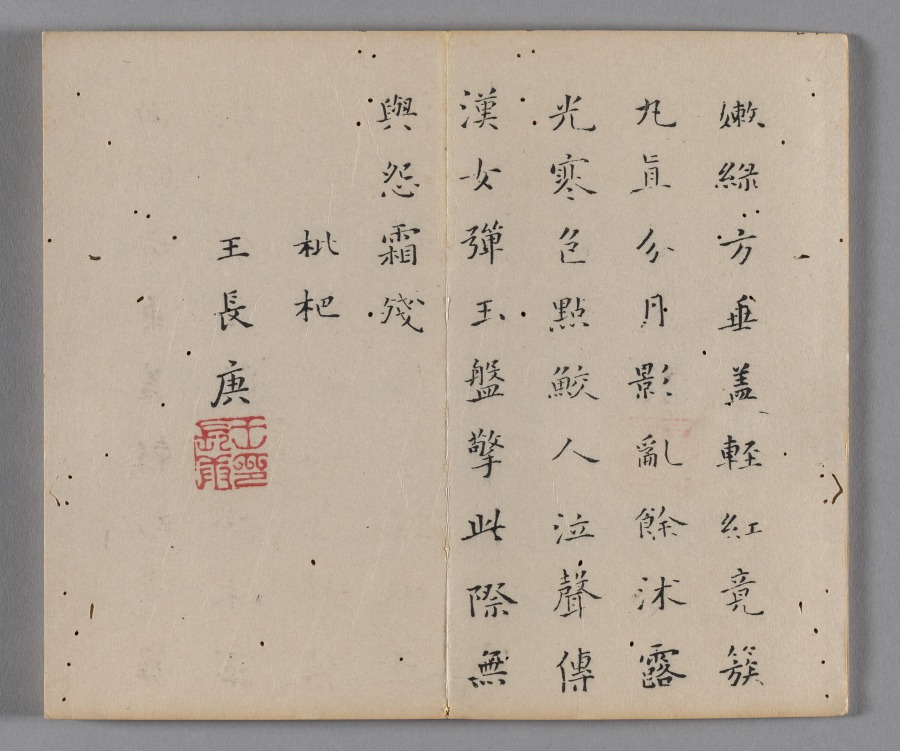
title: Ten Bamboo Studio Painting and Calligraphy Handbook (Shizhuzhai shuhua pu): Fruit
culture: China, Qing dynasty (1644-1911)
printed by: Hu Zhengyan (Chinese, c. 1584–1674)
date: 1633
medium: Woodblock-printed book; ink and colors on paper; first edition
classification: Print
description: Color printing reached a level of perfection in the early 1600s, as seen in this Ten Bamboo Studio Collection of Calligraphy and Painting and the Mustard Seed Garden Manual of Painting (printed 1679 and 1701). The painterly quality, precision in registering (aligning) the woodblocks, and harmonious colors made them the most successful color print editions in Chinese history. Both editions were printed and compiled in Nanjing, spread nationwide, and had a great impact on the arts in Japan and Korea.